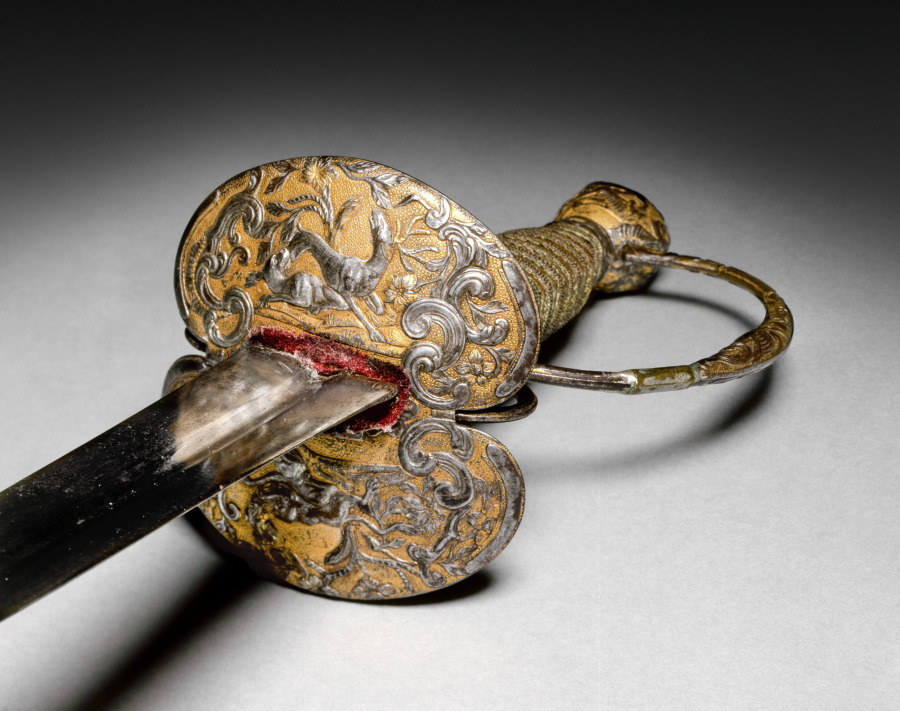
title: Small Sword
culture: France, Paris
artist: after a design by Jean-Baptiste Oudry (French, 1686–1755)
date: c.1750–60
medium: steel, gilt and russeted, copper, wood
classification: Arms and Armor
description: The hilt, pommel, and guard of this sword are richly chiseled in low relief against a stippled gold background with animals (dogs, a stag, ducks) that appear to be adapted from paintings by Jean-Baptiste Oudry (1686–1775). An elegant court sword such as this was an important accessory to a gentleman's attire, yet remained functional—it could be withdrawn for an impromptu duel.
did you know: Although fully functional, this sword was used more for show—a perfect accessory for a fashionable gentleman having his portrait painted.